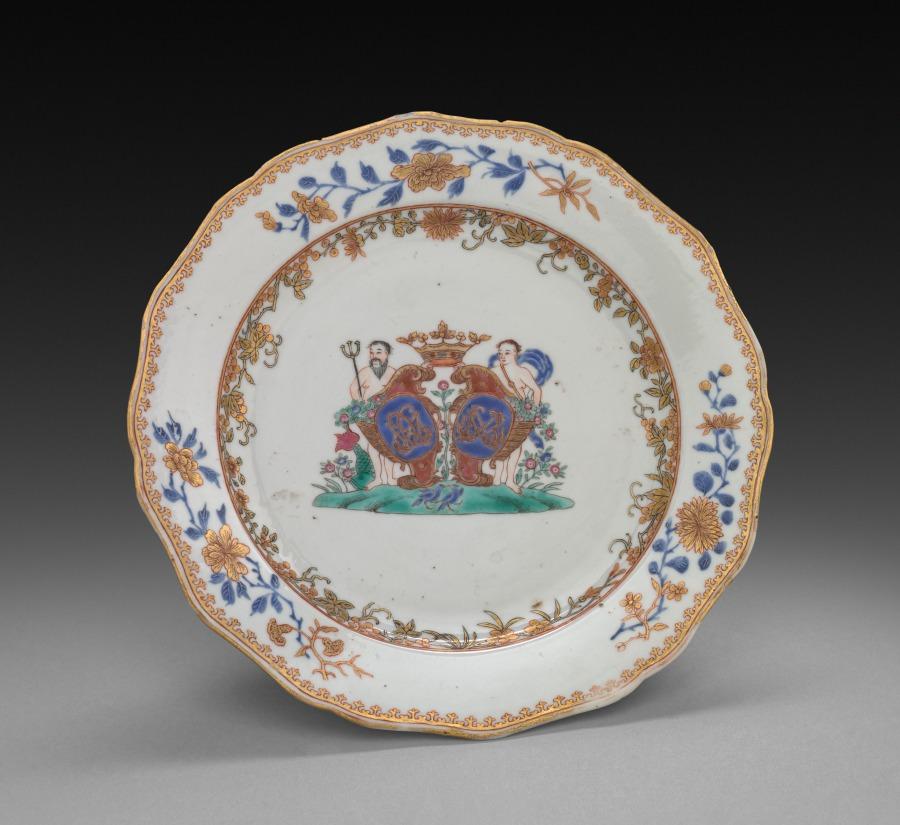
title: Dinner Plate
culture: China, Chinese Export, 18th century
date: 1760–1770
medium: porcelain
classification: Ceramic